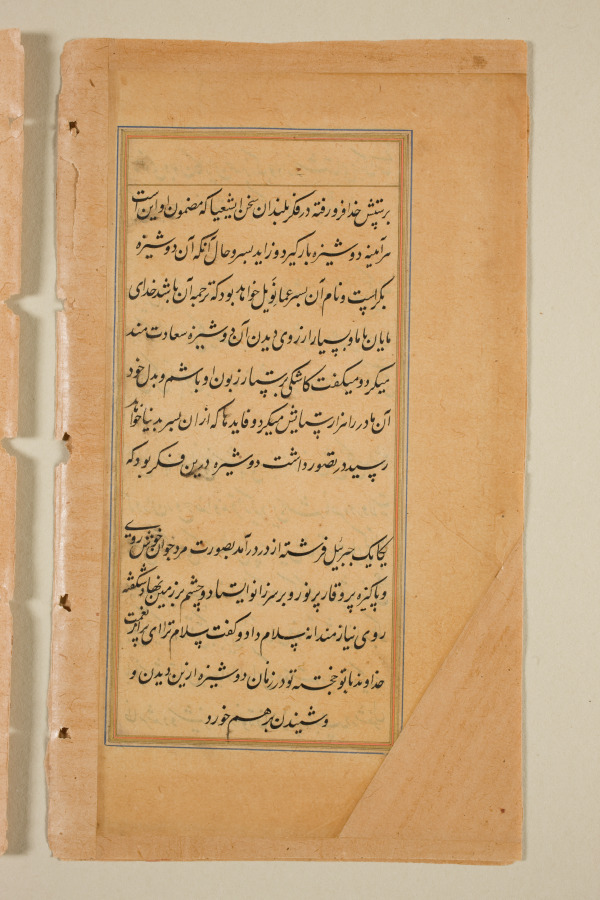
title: Text, folio 14 (verso), from a Mirror of Holiness (Mir’at al-quds) of Father Jerome Xavier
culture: Mughal India, Allahabad, made for Prince Salim (1569–1627)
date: 1602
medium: Ink and gold on paper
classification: Manuscript